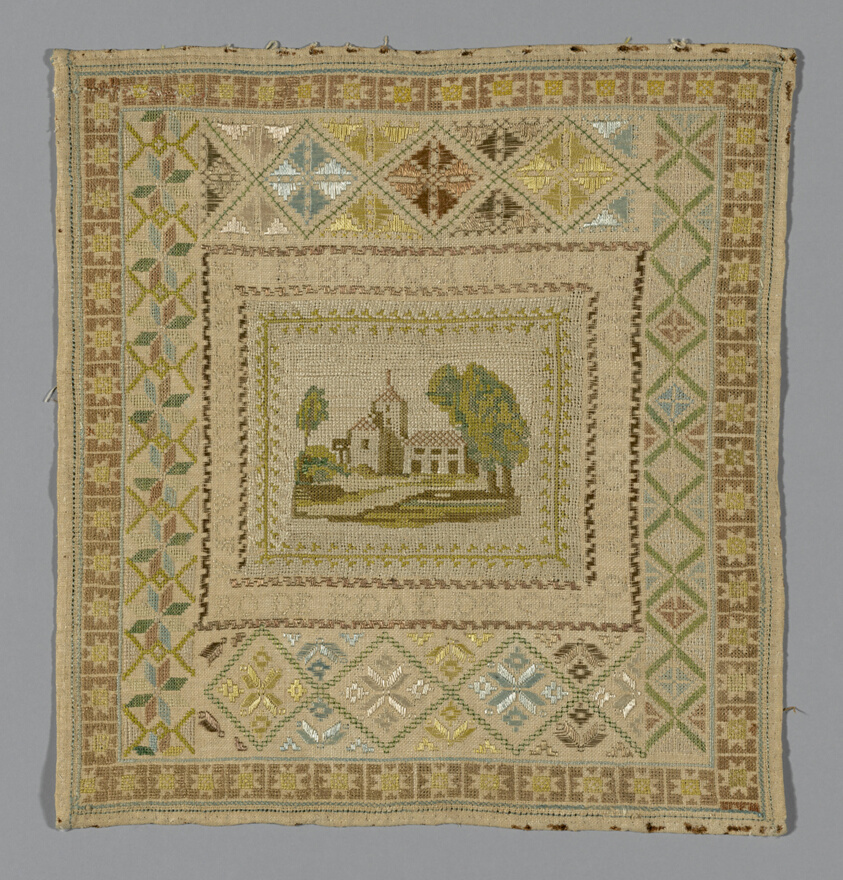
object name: Textile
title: Sampler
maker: Italy or Spain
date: 18th/19th century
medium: Linen, silk, plain weave; embroidered in cross and straight stitches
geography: Italy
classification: textile; needlework (visual works); sampler